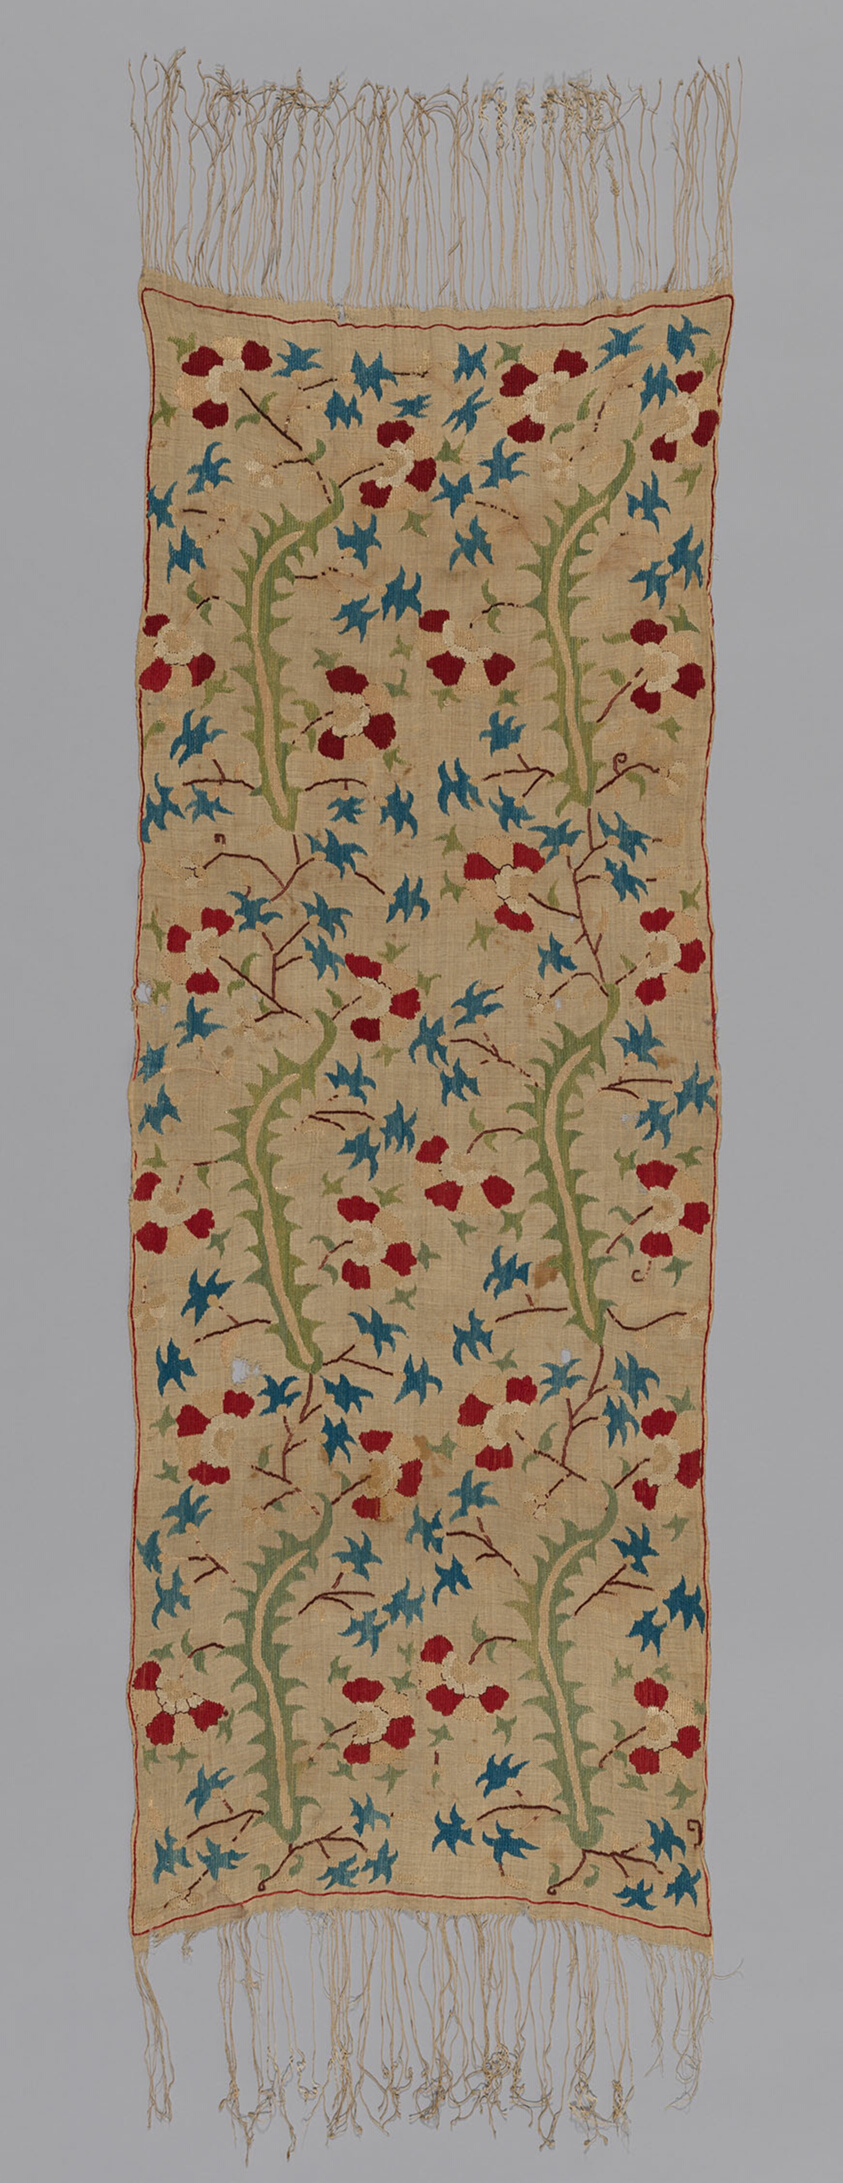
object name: Textile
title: Possibly a Towel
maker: Greece, Epirus Province, Ioannina or Ionian Islands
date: 1700/1900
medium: Linen, plain weave; embroidered with silk in double running, satin, and stem stitches; plied warp fringe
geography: Greece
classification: textile; needlework (visual works)